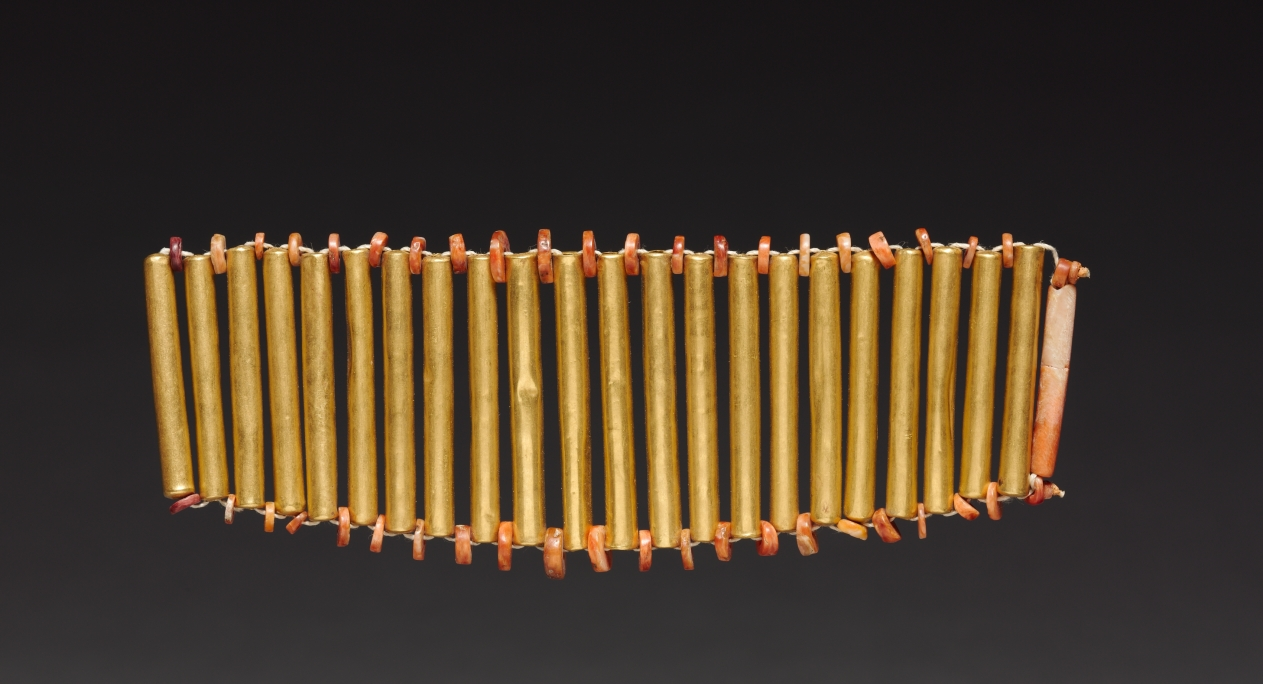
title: Bracelet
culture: Central Panama, (Sitio Conte?), Conte Style, 5th century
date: c. 400–500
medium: gold and shell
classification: Jewelry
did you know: These ancient beads were restrung in modern times.